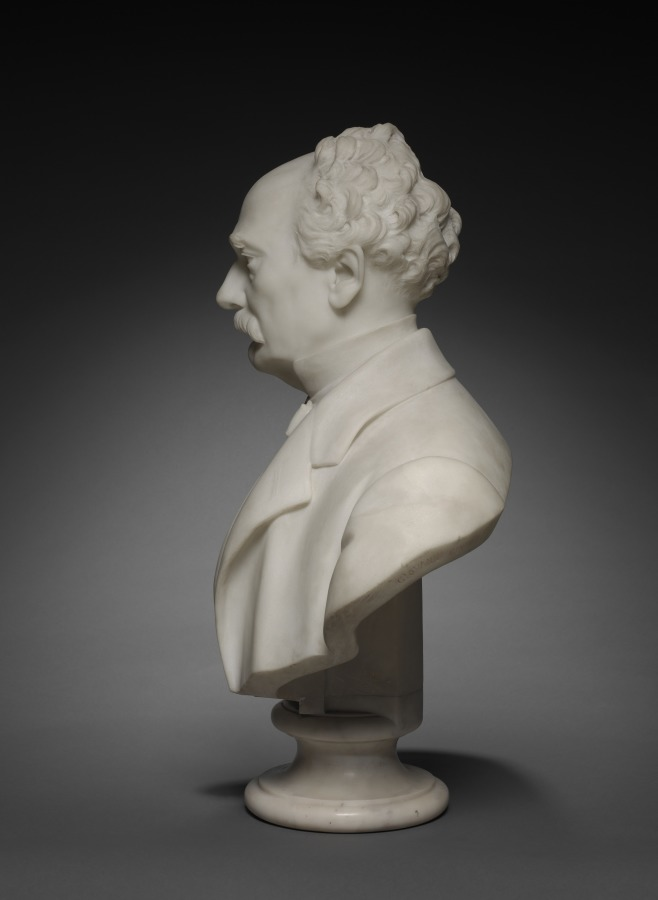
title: Bust of Hinman B. Hurlbut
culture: Italy, Rome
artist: Giovanni Cintselli (Italian, 1832–1883)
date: c. 1870–83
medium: marble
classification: Sculpture